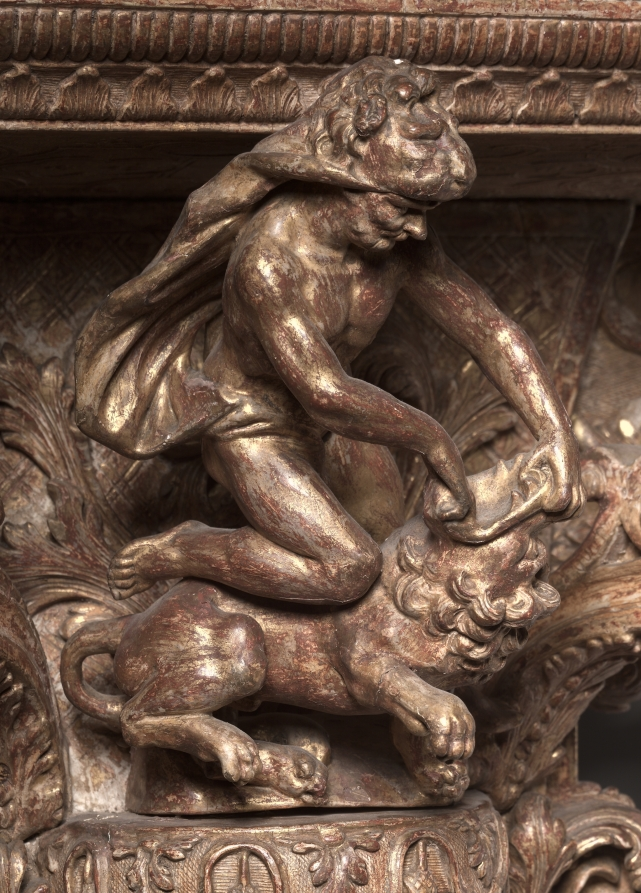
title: Wall Bracket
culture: France, 17th century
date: c. 1650–75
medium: carved and gilt wood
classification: Furniture and woodwork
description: The carved decoration depicts Hercules and the Nemean lion.